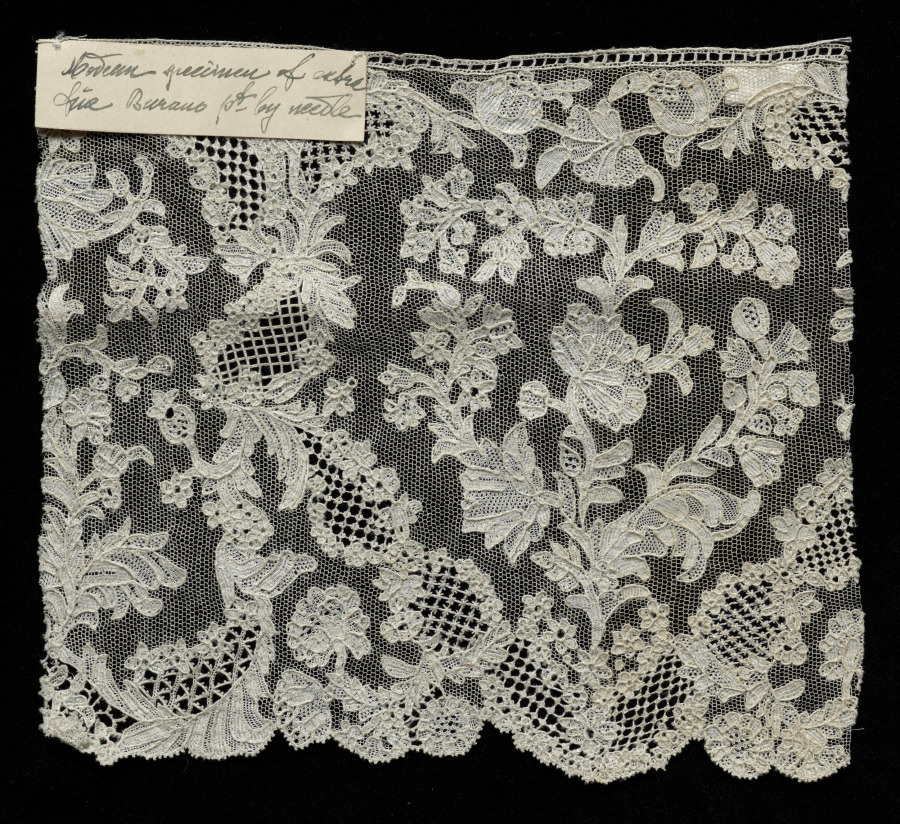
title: Lace Edging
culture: Italy, Burano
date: 1900–1935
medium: Linen: needle lace (Burano Point)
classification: Lace